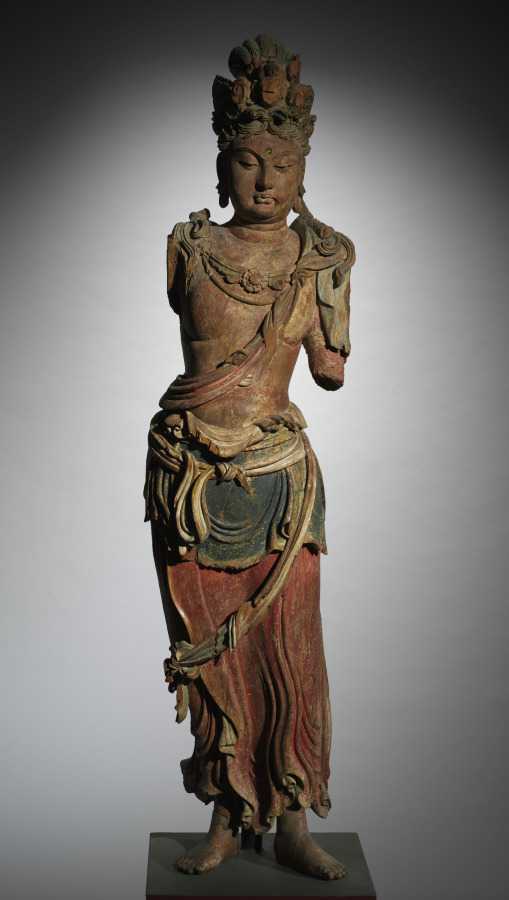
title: Eleven-Headed Guanyin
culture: China, late Northern Song dynasty (960-1127) - Jin dynasty (1115-1234)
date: 1100–1200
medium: wood with polychromy and cut gold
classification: Sculpture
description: The bodhisattva is an enlightened being dedicated to the spiritual awakening of all beings. The compassionate bodhisattva Guanyin, in a variety of manifestations, is probably the most popular deity of worship in Chinese Buddhism. In the Esoteric Buddhist form shown here, this standing Guanyin has a total of eleven heads, with smaller ones above the principal head. The uppermost head represents the Buddha Amitabha, to whom he is closely related. The eleven heads symbolize the Buddha’s steps on the path to enlightenment.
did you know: This Guanyin is carved from a single block of willow (genus Salix sp.).